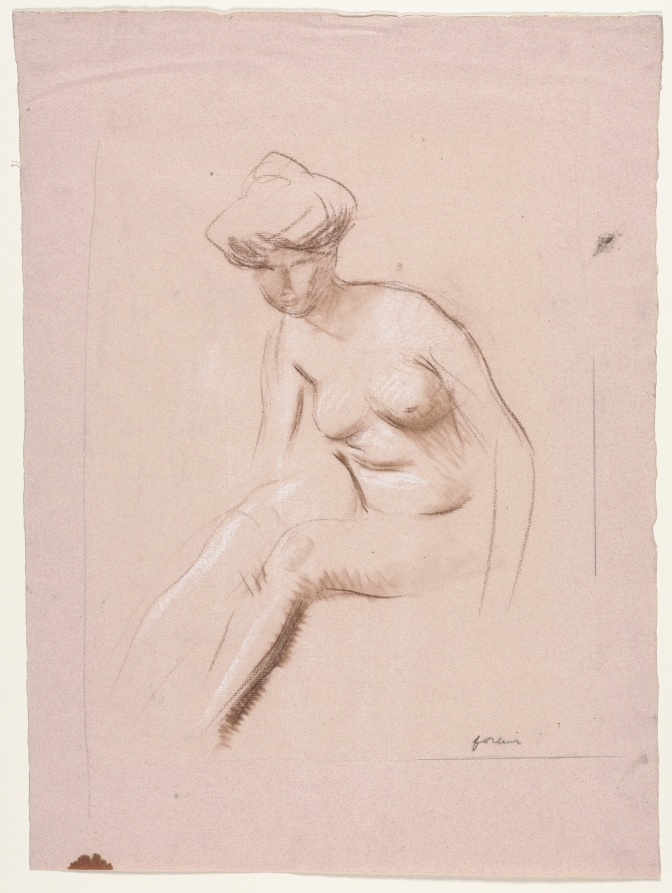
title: Seated Nude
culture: France, late 19th-early 20th Century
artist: Jean Louis Forain (French, 1852–1931)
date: fourth quarter 1800s or first third 1900s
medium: brown, white, and black chalk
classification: Drawing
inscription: signed, lower right, in black chalk: forain ; VERSO, lower right, in black crayon?: 400